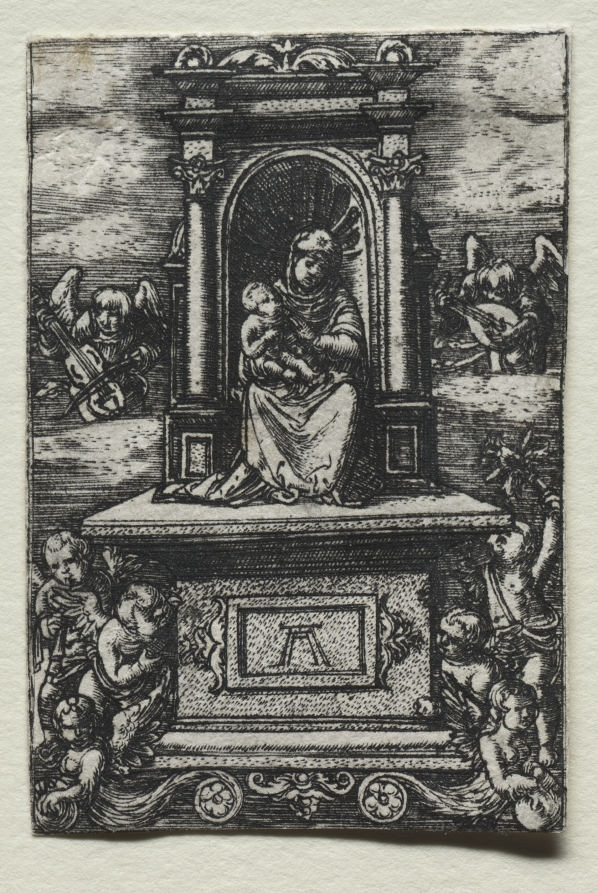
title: The Beautiful Virgin of Ratisbon on an Altar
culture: Germany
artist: Albrecht Altdorfer (German, c. 1480–1538)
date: soon after 1520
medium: engraving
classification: Print